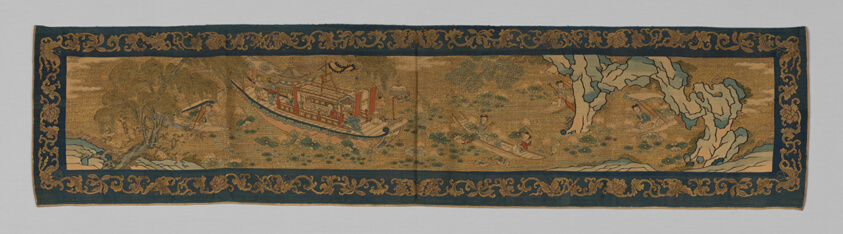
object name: Textile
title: Valance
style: kangxi, qing, Chinese (culture or style), East Asian, asian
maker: China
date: Qing dynasty (1644–1911), 1875-1900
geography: China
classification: textile; weaving